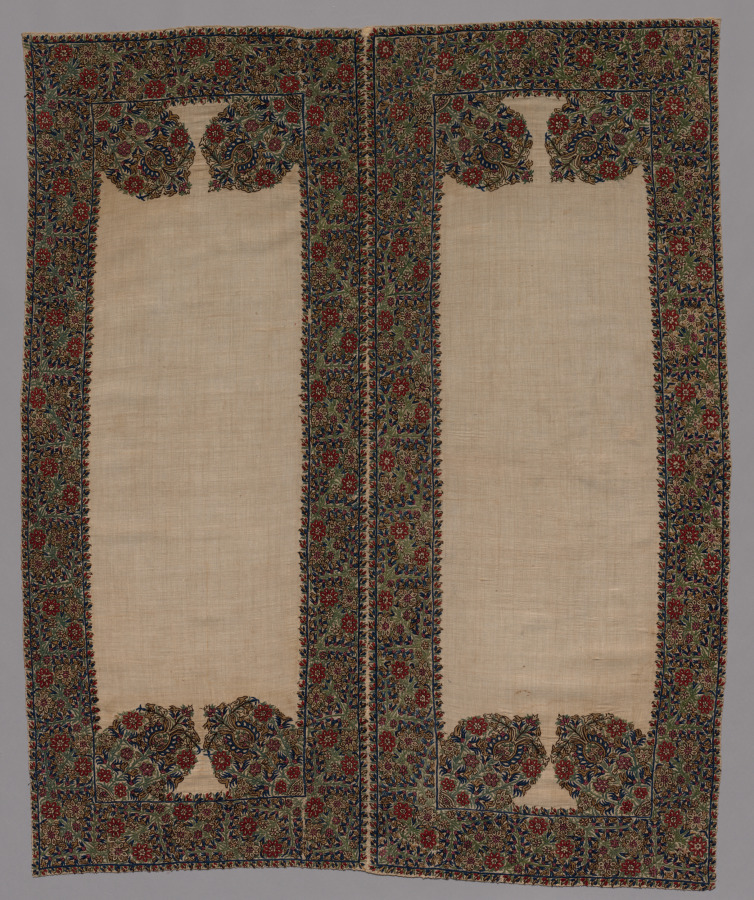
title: Front and Back of a Bolster Case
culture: Greece, Epirus, Yaninna, 18th century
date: 1700s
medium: embroidery: silk on linen tabby ground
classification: Embroidery